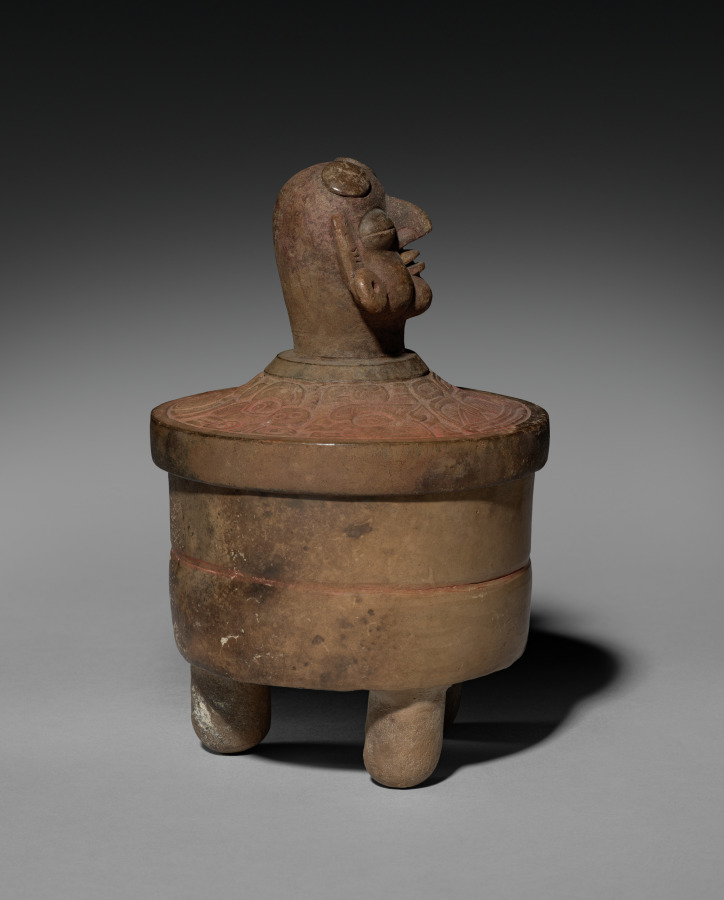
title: Tripod Vessel with Lid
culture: Mexico or Central America, Maya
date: 250–600 CE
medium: earthenware with pigment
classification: Ceramic